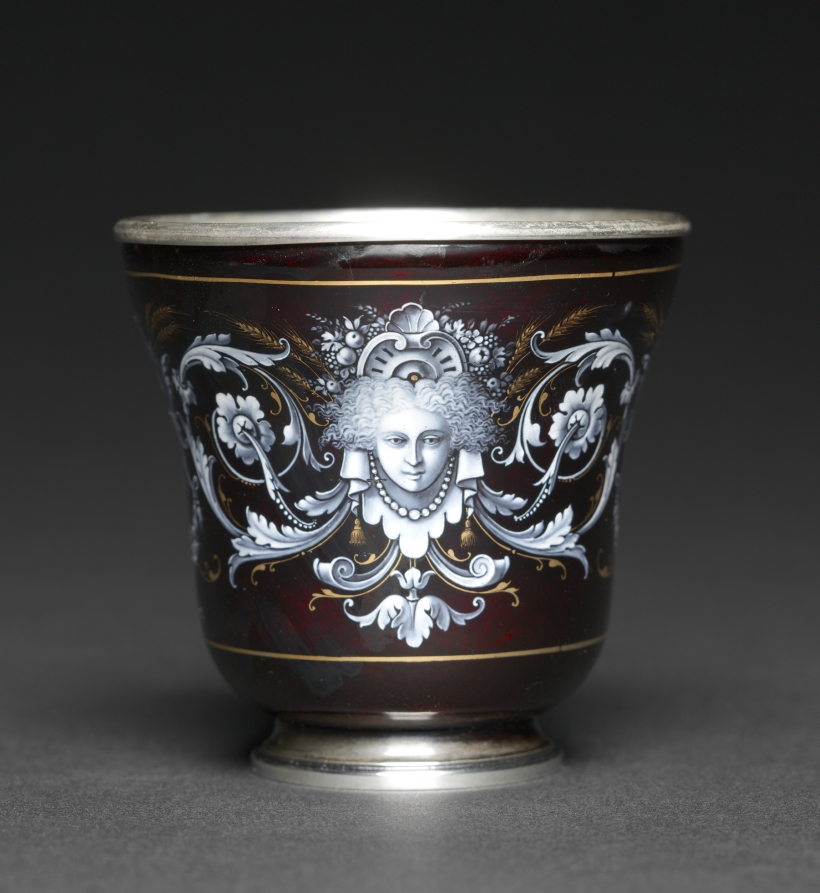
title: Cup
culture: France, 19th century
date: c.1880–1900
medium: silver, enamel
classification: Enamel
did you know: This cup and saucer were made during the Belle Epoque or "Beautiful Era" in France.